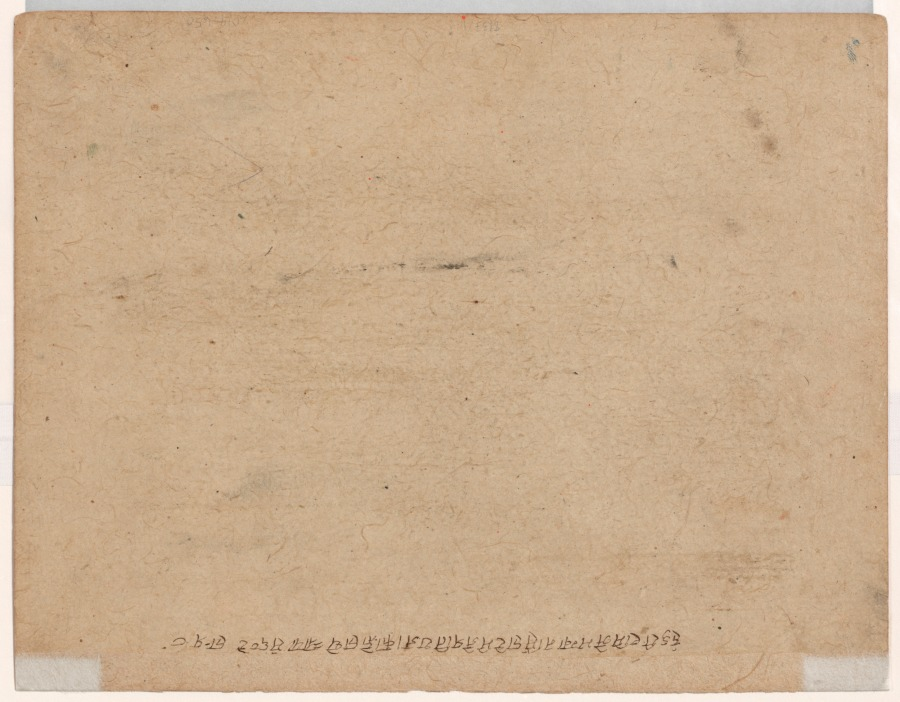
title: Kali on Shiva, from a Tantric Devi Series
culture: Northern India, Pahari kingdoms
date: c. 1810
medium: gum tempera and gold on paper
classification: Painting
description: The goddess Kali kneels in the posture reserved for wrathful deities ready for battle. In one hand she holds the sword she used to sever the demon head she triumphantly grasps in another hand. As the personification of divine energy—shakti in Sanskrit—Kali appears active, while the male principle, personified as her consort Shiva, is like a corpse (shava). The scene is set in a cremation ground, complete with vultures, jackals, and bones. Contemplation of paintings such as this assists followers in overcoming fear of death. In this image, the dead body is overlaid with the dual principles of the divine in Hindu thought: male and female, passive and active, matter and energy, white and black, Shiva and Shakti.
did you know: This Tantric Devi painting is from a series made in the Pahari Kingdom of Mandi. CMA also has another from the same series, 2020.431.